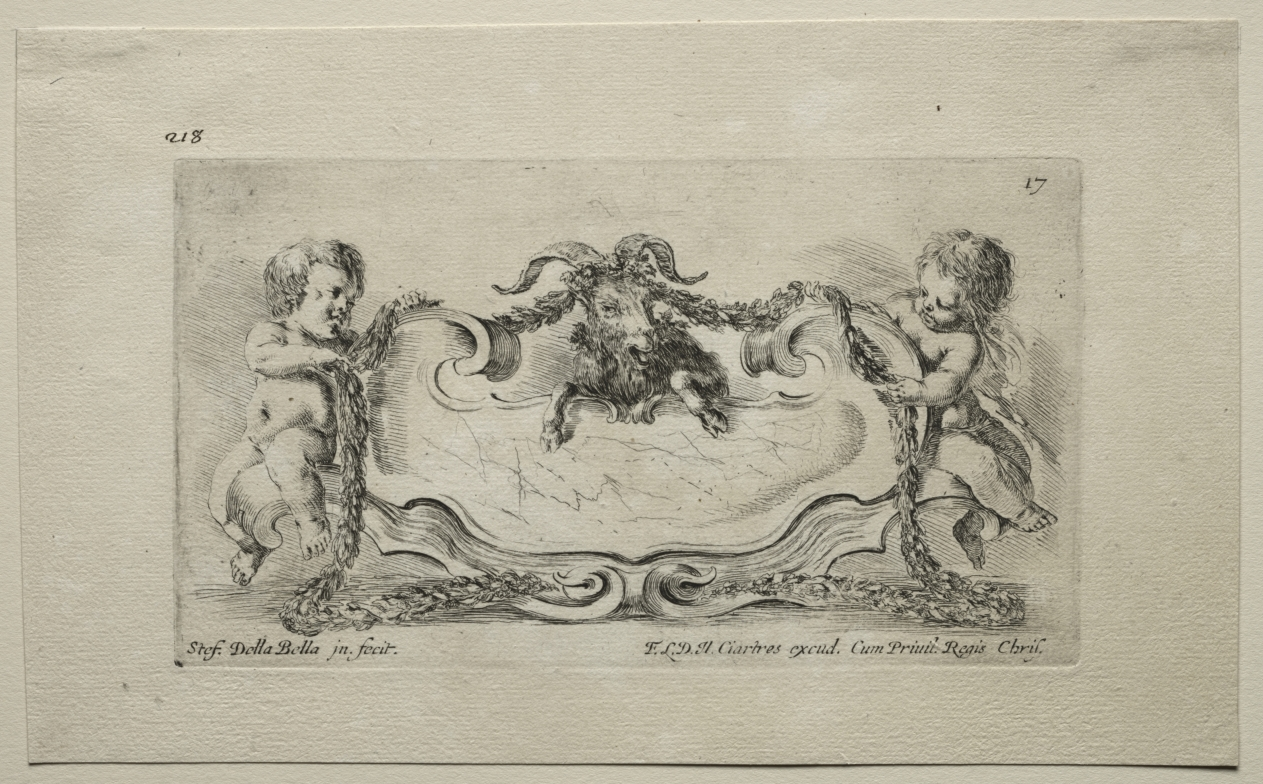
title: Collection of Various Caprices and New Designs of Cartouches and Ornaments: No 17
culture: Italy, 17th century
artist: Stefano Della Bella (Italian, 1610–1664)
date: 1646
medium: etching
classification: Print